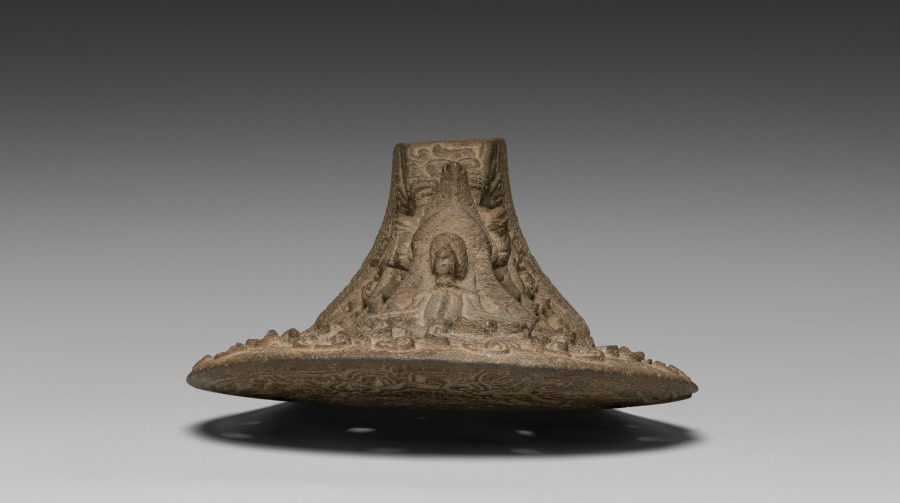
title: Ballgame Palma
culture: Mexico, Gulf Coast, Classic Veracruz style (600-1100)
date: c. 900–1100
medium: stone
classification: Sculpture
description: Stone palmas—so-called today for their palm frond-like shape—are ceremonial sculptures that may replicate lightweight gear worn over the chest during the ballgame. The scene on the back of this palma vividly illustrates the tie between the ballgame and sacrifice. A bat descends from the top, clutching severed human body parts, and at the center an upright figure brandishes a blade over a reclining victim. The scene's many animal figures, including the one on the front, may belong to ballgame mythology that now is lost.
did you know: The Mesoamerican ballgame was played with a hard rubber ball that players bounced off their hips.